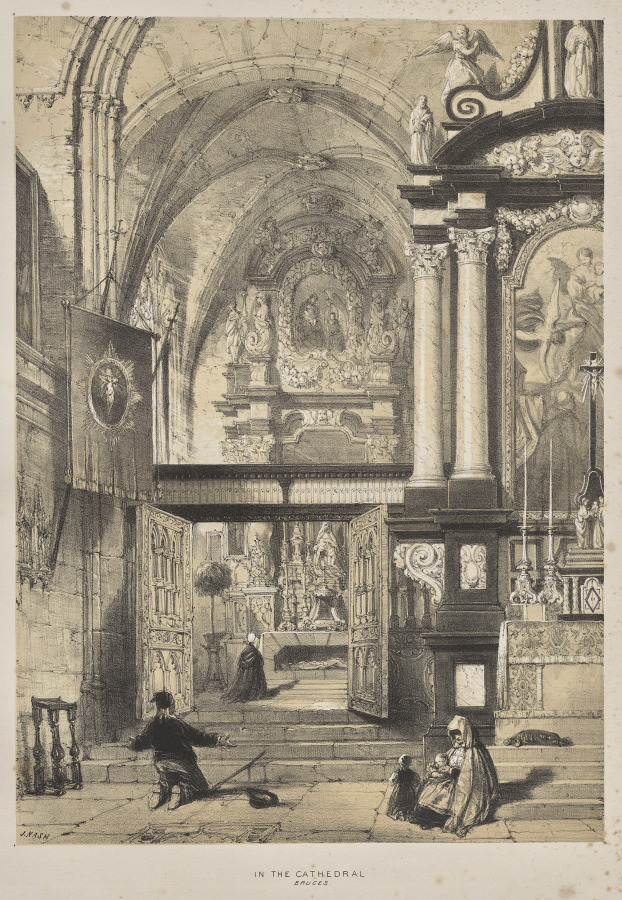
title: Architecture of the Middle Ages: In the Cathedral, Bruges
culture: England, 19th century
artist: Joseph Nash (British, 1808–1878)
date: 1838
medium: lithograph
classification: Print